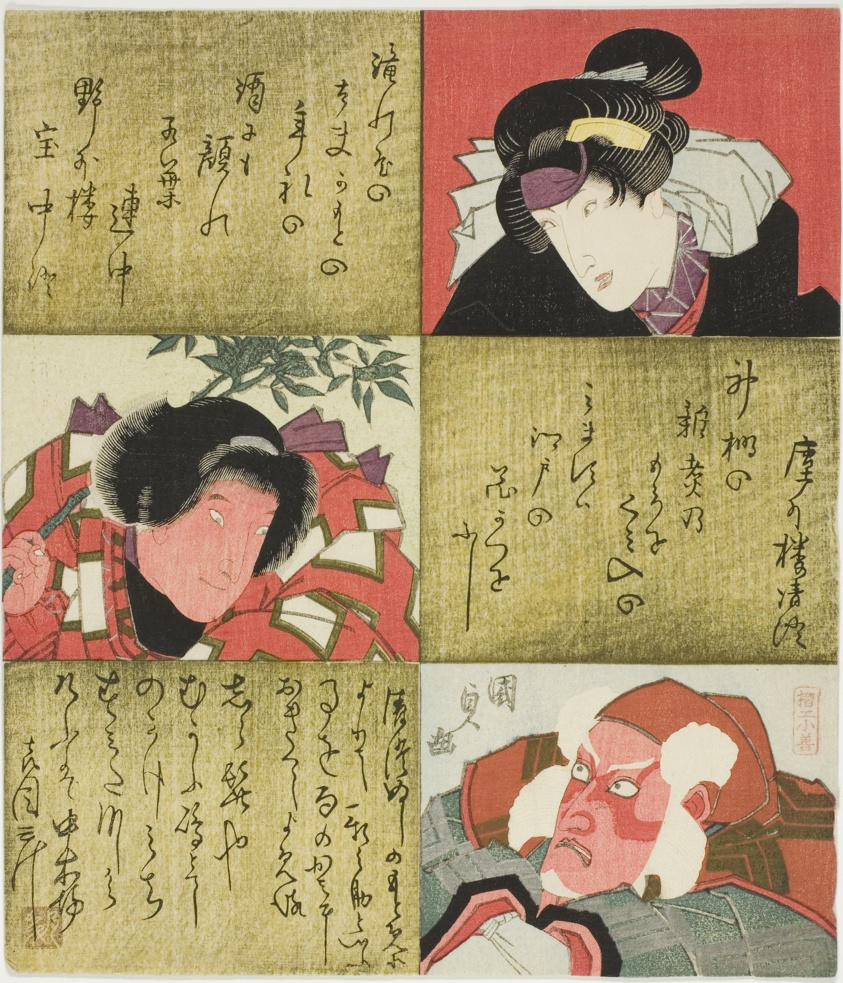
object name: Print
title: The actors Iwai Hanshiro VI, Ichikawa Danjuro VIII as Kintoki, and Ichikawa Ebizo V as the woodcutter Nekko no Yokizo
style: Japanese (culture or style)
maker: Utagawa Kunisada I (Toyokuni III) (Japanese, 1786-1864)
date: 1833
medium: Color woodblock print; shikishiban, surimono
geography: Japan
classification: woodblock print; print; asian art